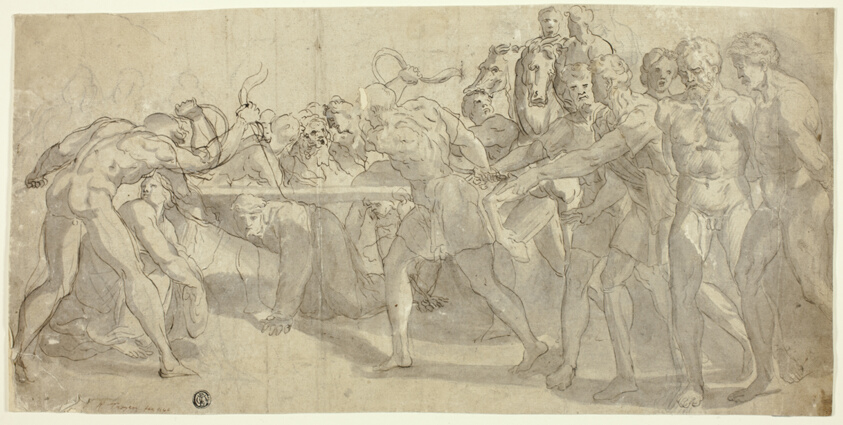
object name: Drawing and Watercolor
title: Calvary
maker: Rombout van Troyen (Netherlandish, c. 1605-c. 1650); or the style of Raymond de Lafage (French, 1656-1690)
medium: Pen and brown ink, with brush and brown-gray wash, over black chalk, on ivory laid paper, tipped onto tan wove paper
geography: Netherlands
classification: pen and ink drawings; drawings (visual works); prints and drawing